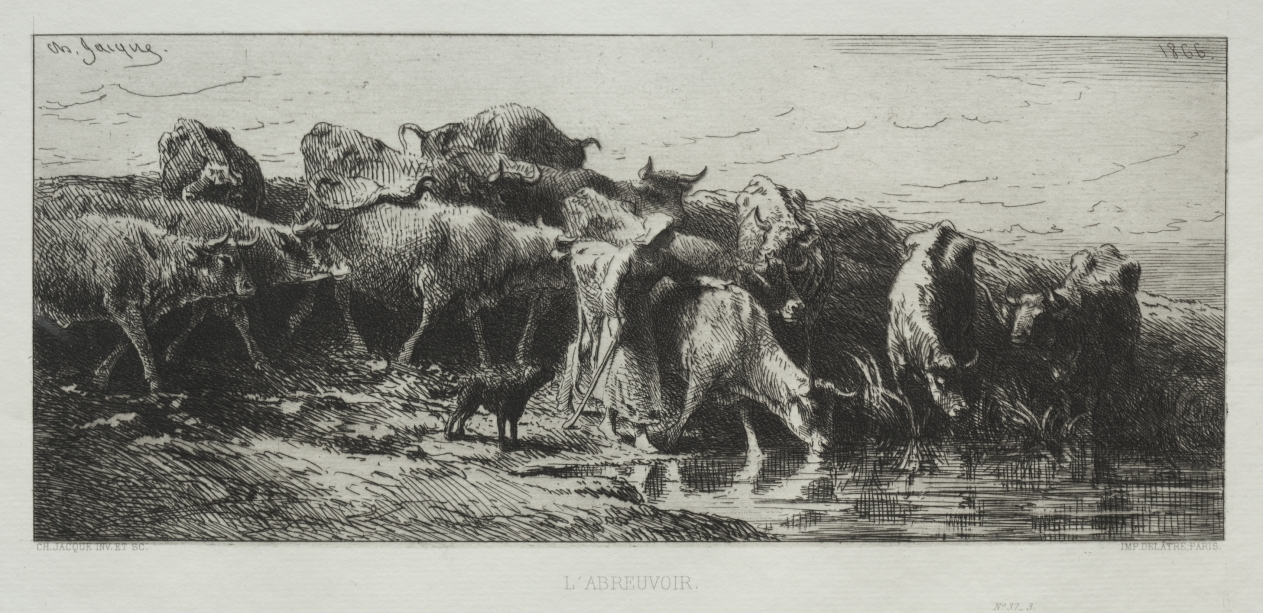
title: L'Abreuvoir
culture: France, 19th century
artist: Charles-Émile Jacque (French, 1813–1894)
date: 1866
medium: etching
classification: Print